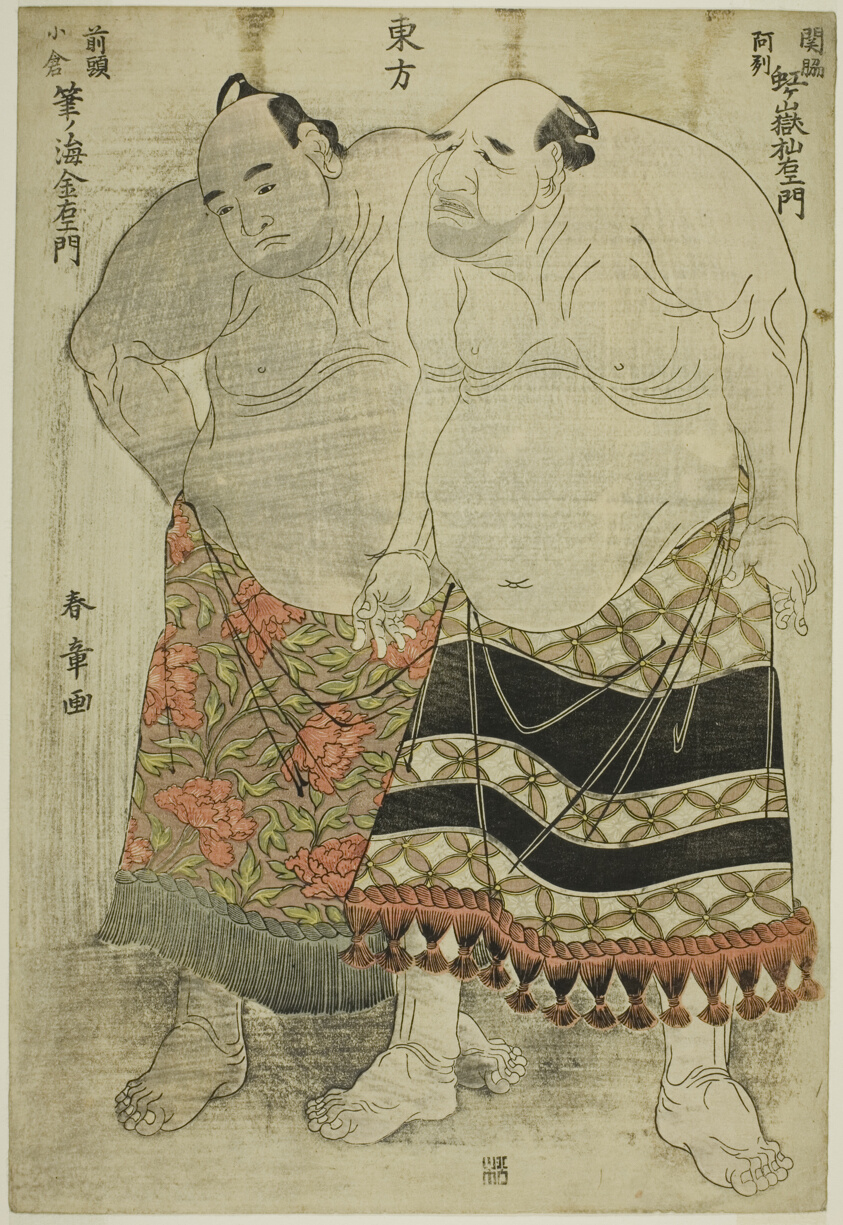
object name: Print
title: Sumo Wrestlers of the Eastern Group: (right) Nijigadake Somaemon of Sekiwake Rank from Awa Province, and (left) Fudenoumi Kin'emon of Maegashira Rank from Kokura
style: Japanese (culture or style)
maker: Katsukawa Shunsho 勝川 春章; Japanese, 1726-1792; Publisher: Matsumura Yahei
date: c. 1782/83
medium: Color woodblock print; oban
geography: Japan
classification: woodblock print; print; asian art